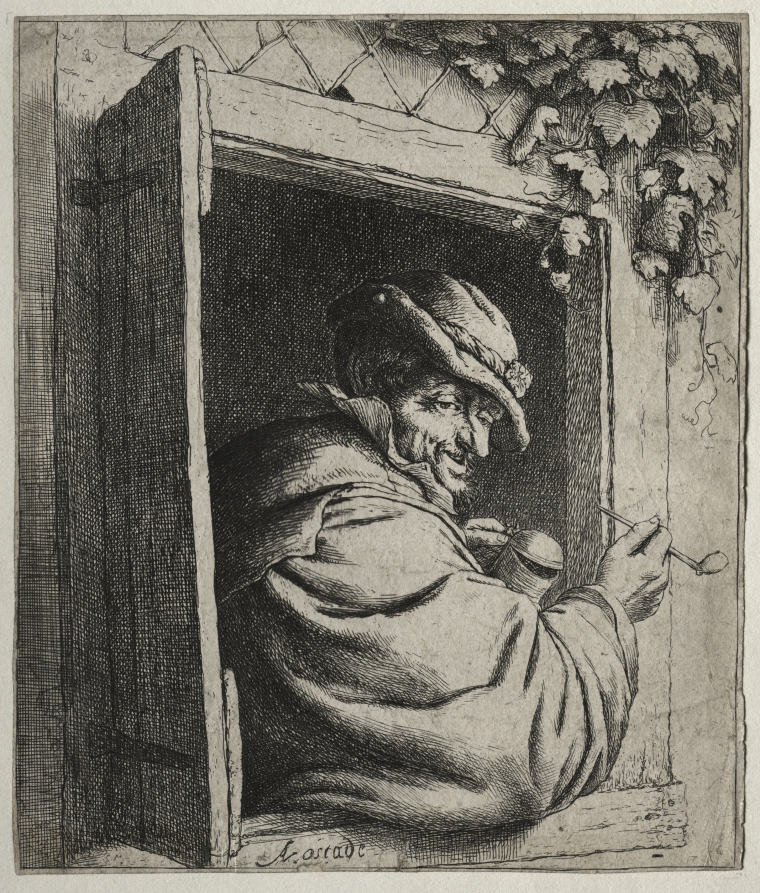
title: The Smoker at the Window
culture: Netherlands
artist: Adriaen van Ostade (Dutch, 1610–1684)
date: c. 1648–50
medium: etching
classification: Print